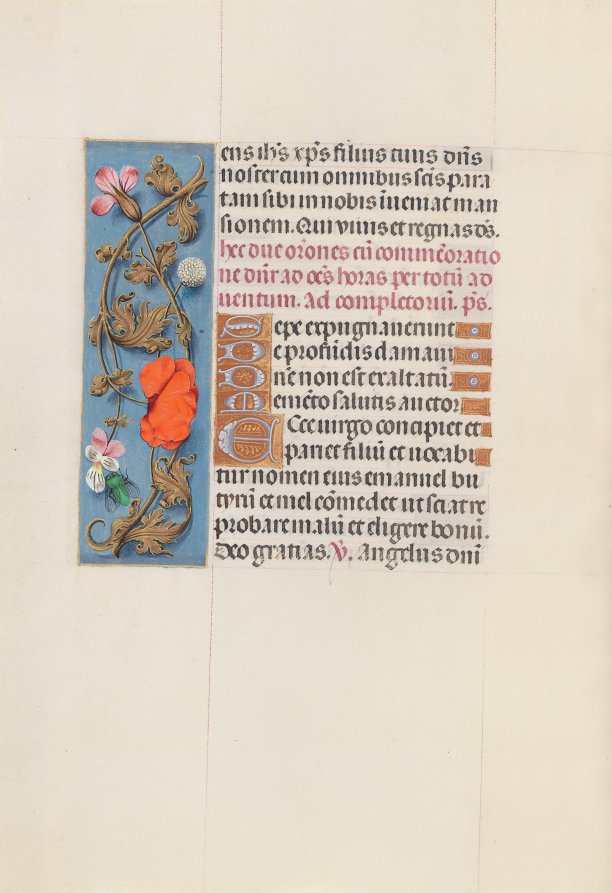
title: Hours of Queen Isabella the Catholic, Queen of Spain: Fol. 161v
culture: Flanders, Ghent and Bruges, late 15th century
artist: Master of the First Prayerbook of Maximillian (Flemish, c. 1444–1519)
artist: and Associates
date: c. 1500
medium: ink, tempera, and gold on vellum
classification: Bound Volume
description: This manuscript was illuminated by a circle of at least five highly organized manuscript painters active in the Flemish cities of Ghent and Bruges. The principal illuminator was Alexander Bening, who painted the majority of the book's miniatures. Manuscripts produced by this circle of artists are renowned for the decoration of their borders, which typically feature a rich variety of realistically-painted flowers, birds, and butterflies. This prayer book, called a book of hours, was intended not for a cleric, but for the private devotions of a lay person-in this case, Isabella the Catholic, Queen of Spain (1451-1504). Isabella's coat of arms embellishes the book's frontispiece. It is unlikely that the book was commissioned by the Queen herself; rather, she probably received it as a diplomatic gift from someone courting her patronage, perhaps Cardinal Francisco Jimenez de Cisneros. A Franciscan friar, Jimenez was dependent upon Isabella for his advancement, first to the post of Queen's confessor in 1492, and then to Archbishop of Toledo in 1495.